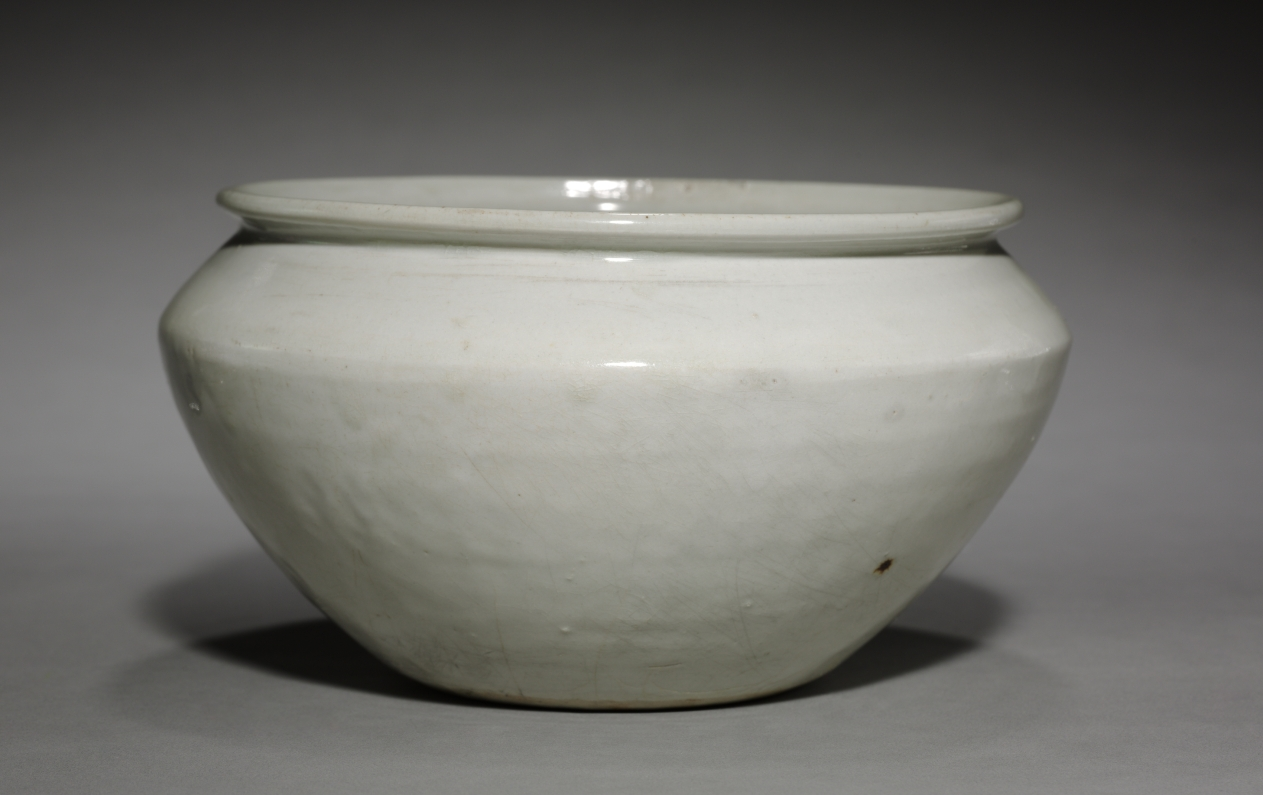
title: Bowl: Southern White Ware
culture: China, Tang dynasty (618-907) - Five dynasties (907-960)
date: late 800s-early 900s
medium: Glazed porcelain, Southern white ware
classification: Ceramic